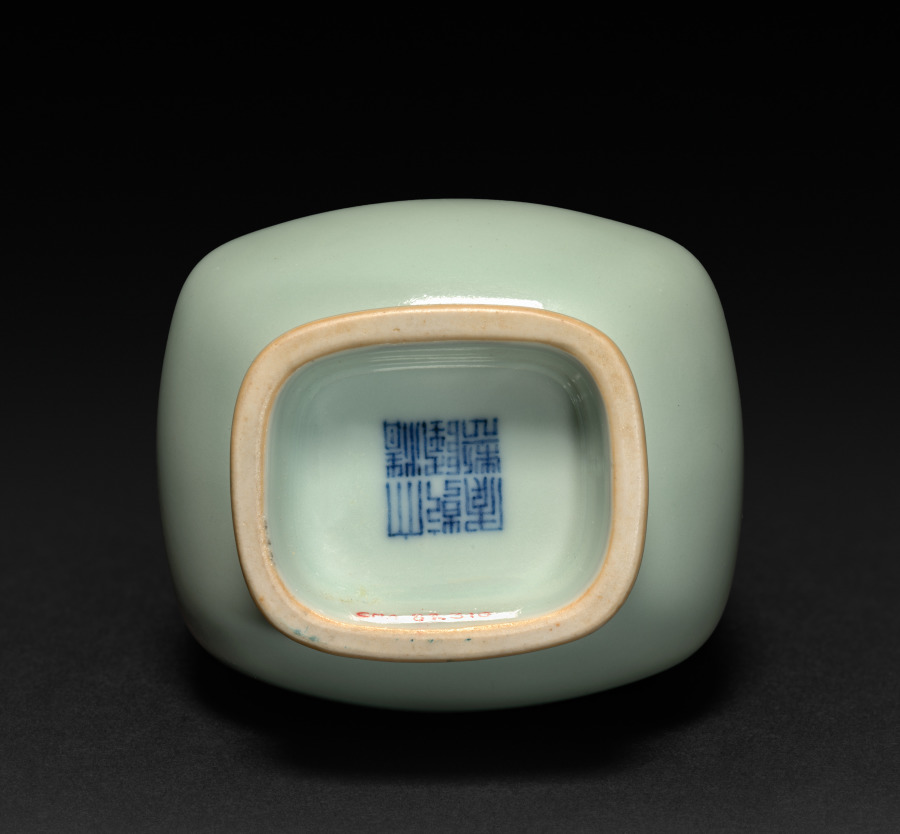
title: Vase in Form of Archaic Hu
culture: China, Jiangxi province, Jingdezhen kilns, Qing dynasty (1644-1911), Qianlong mark and reign (1736-95)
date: 1736–95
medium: porcelain with celadon glaze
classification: Ceramic